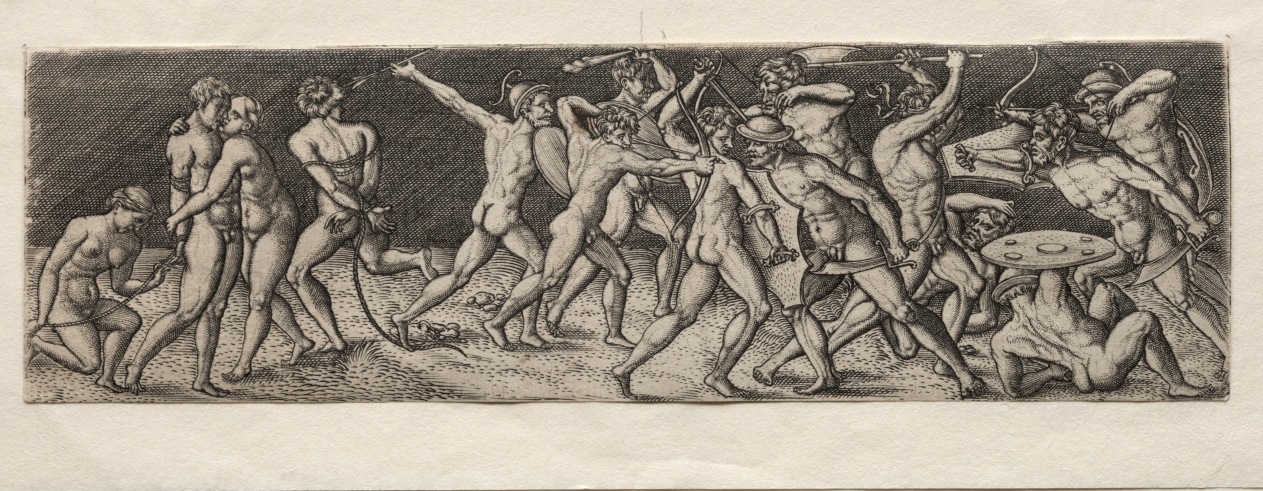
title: Fight between Eleven Warriors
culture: Netherlands, 16th century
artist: Allaert Claesz. (Netherlandish, active c. 1520–26)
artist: after Antonio del Pollaiuolo (Italian, 1431/32–1498)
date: 1520–30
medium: engraving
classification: Print